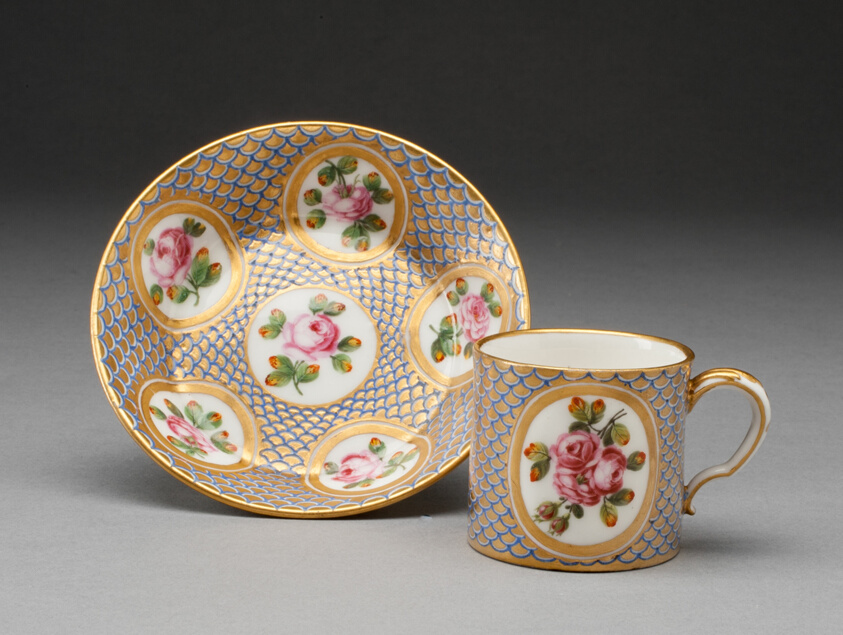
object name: Ceramics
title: Cup and Saucer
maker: Sèvres Porcelain Manufactory; French, founded 1740; Painted by Guillaume Noël (French, 1734/5-1804, active 1755-1800)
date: 1777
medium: Soft-paste porcelain, polychrome enamels, and gilding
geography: Sèvres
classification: drinking vessel; teaware; ceramics; porcelain; european decorative arts